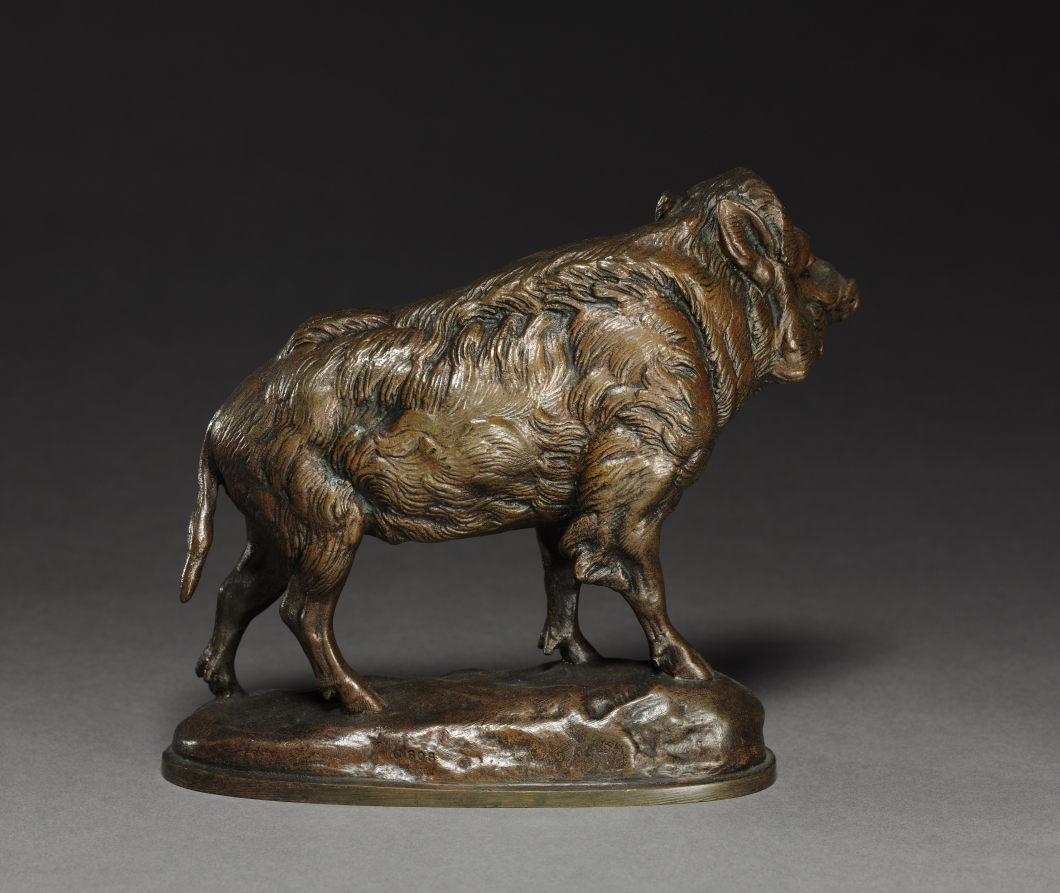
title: Wild Boar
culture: France, 19th century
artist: probably by Antoine-Louis Barye (French, 1796–1875)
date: 19th century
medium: bronze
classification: Sculpture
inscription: Signed" "Barye ALF" (...Foundry(?). On back of base: "C 808", in small letters